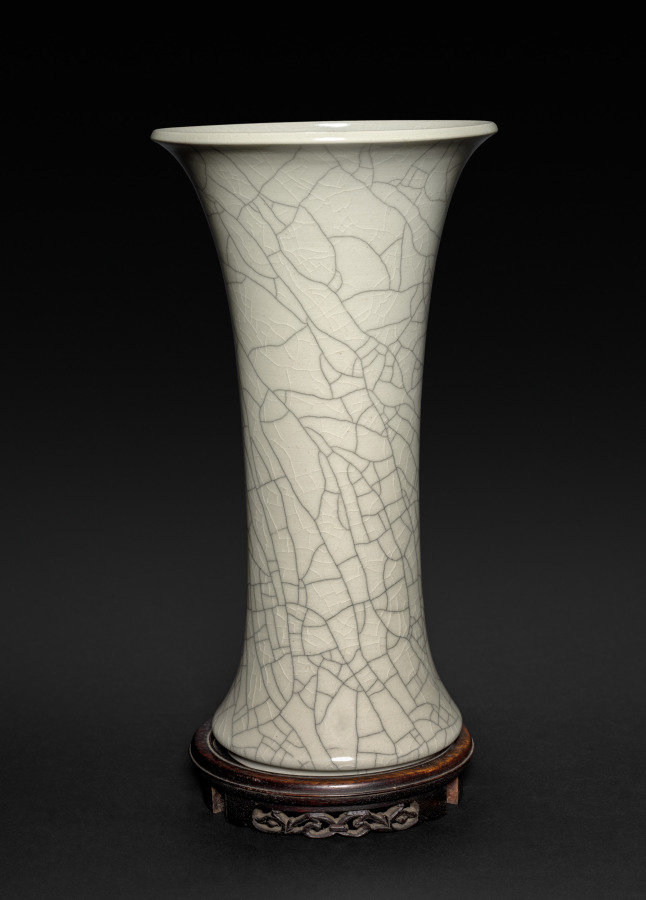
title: Gu-shaped Vase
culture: Japan, Meiji period (1868–1912)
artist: Seifū Yohei III (Japanese, 1851–1914)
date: 1912–14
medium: Porcelain with crackled glaze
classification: Ceramic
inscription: 清風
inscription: 清風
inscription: 帝室技芸員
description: Seifū Yohei III mined the repertoire of Chinese vessel types, from ceramics modeled after ancient ritual bronzes to shapes developed in the Yuan (1279–1368) and Ming (1368–1644) dynasties. His designs tended to be formal and restrained, often featuring creamy white glazes suggestive of the hue of Ding ware and green glazes resembling Longquan ware. This gu-shaped vase has a cracked-ice glaze, which was once customarily called Ge (Japanese pronunciation Ka), after the kiln where it purportedly originated during the Southern Song dynasty (1127–1279). The glaze’s double-crackle pattern, featuring both deeper and shallower cracks, is called “gold threads and iron lines.” The effect was enhanced here by coating the vessel with ink or another stain, which was allowed to seep into the cracks before the surface was wiped clean.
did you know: Gu-shaped vases are relatively slender cylinders that flare at both the mouth and foot with orbs or drumlike forms partway up the vessel.